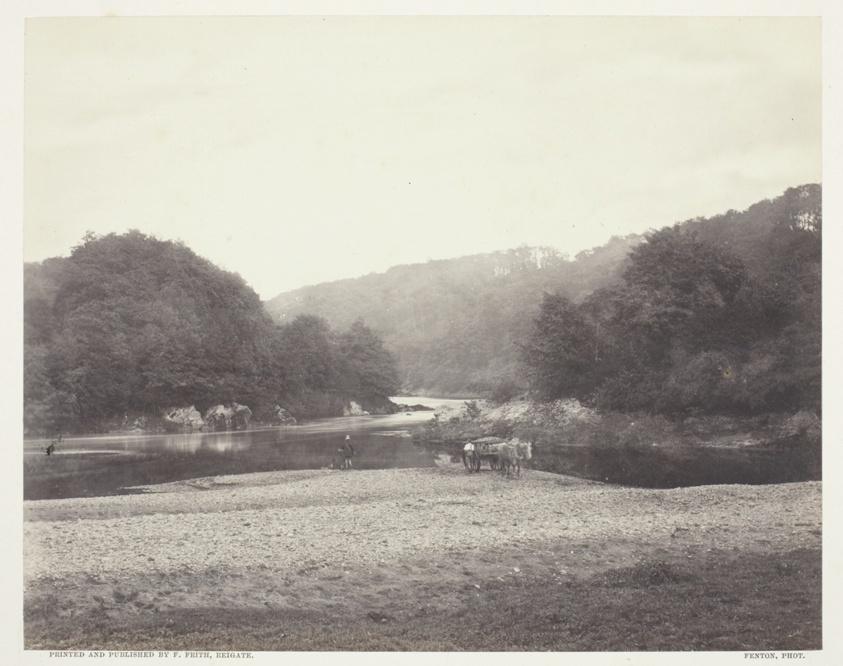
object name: Photograph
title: View of the Ribble, Yorkshire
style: 19th century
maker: Roger Fenton (English, 1819–1869)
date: c. 1860, printed c. 1870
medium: Albumen print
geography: England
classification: albumen silver print; photographic process; photography; photograph